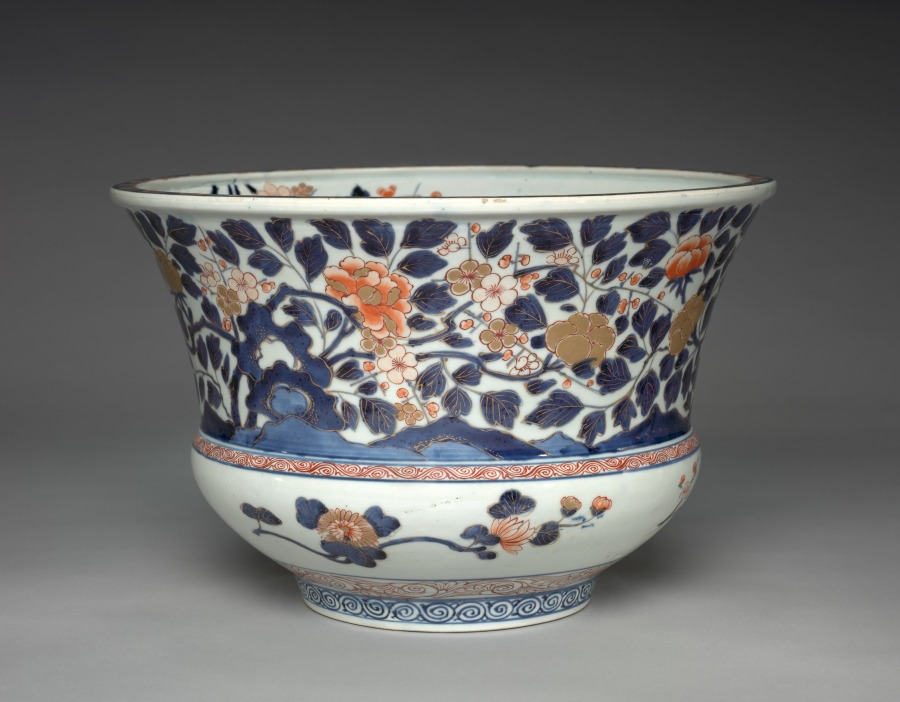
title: Vase (Imari ware)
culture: Japan, Edo period (1615–1868)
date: c. 1700s–1800s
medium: underglaze blue with overglaze red porcelain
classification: Ceramic